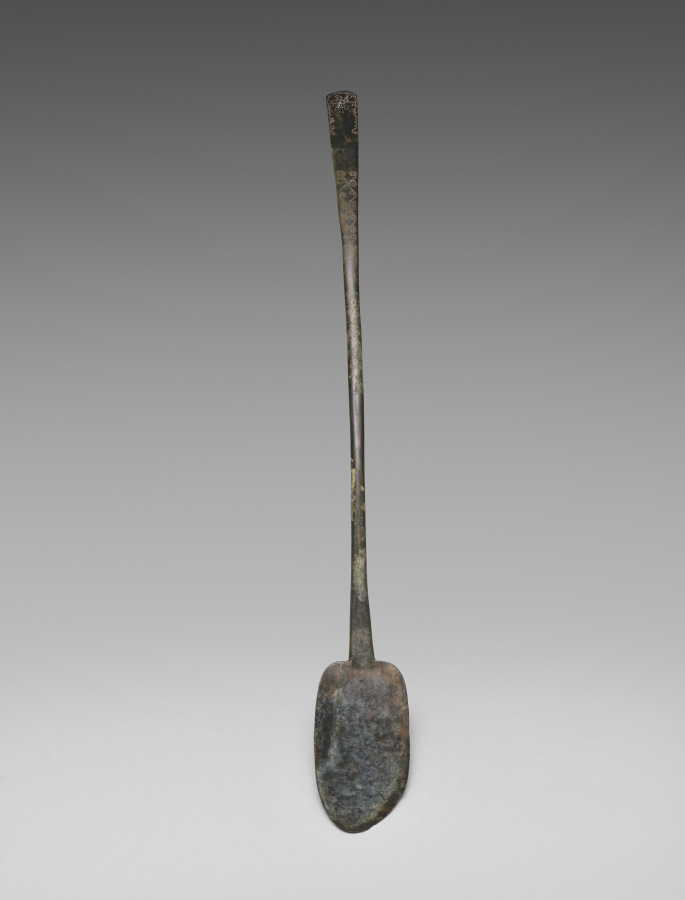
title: Spoon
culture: Korea, Goryeo dynasty (918–1392)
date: 918–1392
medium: silver bronze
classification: Metalwork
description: Celadons, spoons, seals, and bronze mirrors were the most common burial objects in tombs during the Goryeo period (918–1392). Furnishing tombs with an elaborate assemblage of objects was believed to honor and comfort the newly dead. Generally, Goryeo tombs were left untouched until the late 19th century. During the colonial period (1910–45), however, Japanese archaeologists hastily excavated the tombs located in Kaeseong, the former capital of the Goryeo period. Scholars recently have proposed that toward the end of the 14th century, Koreans enjoyed meat-based soups more than any other dishes, explaining why many more spoons than chopsticks were buried in tombs.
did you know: Bronze spoons are the most common burial item. Scholars have proposed that toward the end of the 14th century, Koreans enjoyed meat-based soups more than any other dishes, explaining why spoons became common household items as well as burial goods.